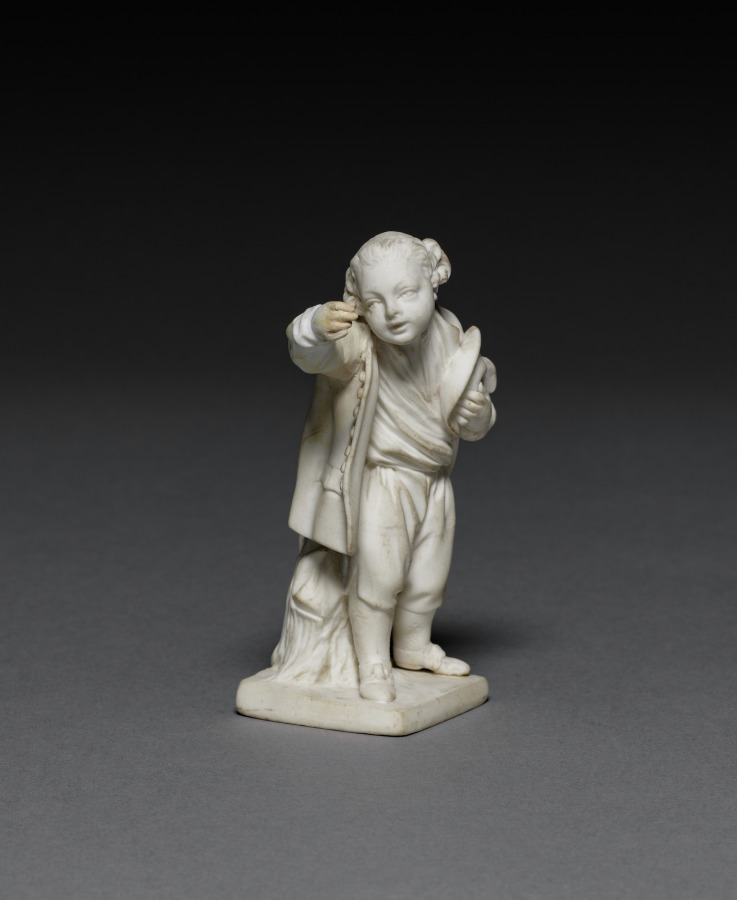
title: Figure of a Bird Charmer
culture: France, Sèvres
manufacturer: Sèvres Porcelain Factory (French, est. 1756)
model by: Etienne-Maurice Falconet (French, 1716–1791)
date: 1764–66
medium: Unglazed soft-paste porcelain (biscuit)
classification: Ceramic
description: Designs for 17 young children involved in various activities were issued by sculptor Étienne-Maurice Falconet and regularly reproduced as porcelain figurines. This figure, who stretches out his hand in anticipation that a bird might land, would have been modeled after one of these designs. Decorative figurines like these were often included in elaborate dining services to be placed about a table along with the usual tureens and tableware.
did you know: 31 figures modeled after Falconet’s series were included in the dinner service given by French King Louis XV to Christian VII, King of Denmark in 1768.